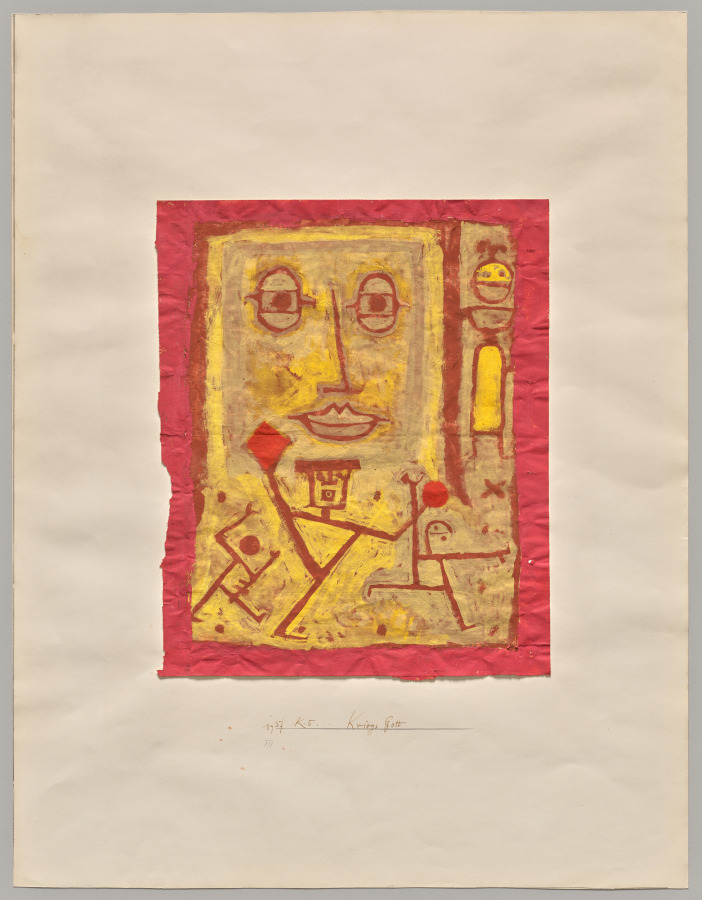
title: God of War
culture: Germany, 20th century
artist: Paul Klee (German, 1879–1940)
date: 1937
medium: Gouache and tempera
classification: Drawing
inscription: signed, upper left, in paint: Klee; secondary support, by artist, lower center, in brown ink: 1937 K. 5. Kriegs Gott ["37 K. 5. Kriegs Gott" underlined in graphite]; lower center, in graphite: III; verso of secondary support, upper left, in graphite: Nos 39 31 / 35 x 29 [all circled]; upper left, on separately applied label: [upper portion cropped] / 1937 [inscribed in blue ink] No [printed in black ink] 0843 [stamped in blue ink] / Paul Klee / Dieu de la Guerre / 35 x 29 [last three lines inscribed in blue ink] / Photo No [printed in black ink]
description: This drawing belongs to a series of large format works with bold colors, thick painterly lines, and pictograph formations that Paul Klee created late in his career. The period during which they were made was marked by anxiety for the artist, as political turmoil grew in Europe during the 1930s. To suggest this experience, Klee painted on a sheet of newspaper, allowing the printed text to intermingle with his own sign-like marks. The article visible here, for example, discusses the Spanish civil war. The figures that dominate the work more subtly suggest this crisis, including a large face with heavy eyelids and an enigmatic smile depicted in layers of yellow paint and several dancing or running figures in the foreground delineated by areas left unpainted.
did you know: Shortly before this drawing was made, Paul Klee was exiled from Germany to his native Switzerland due to the political turmoil that led to World War II.